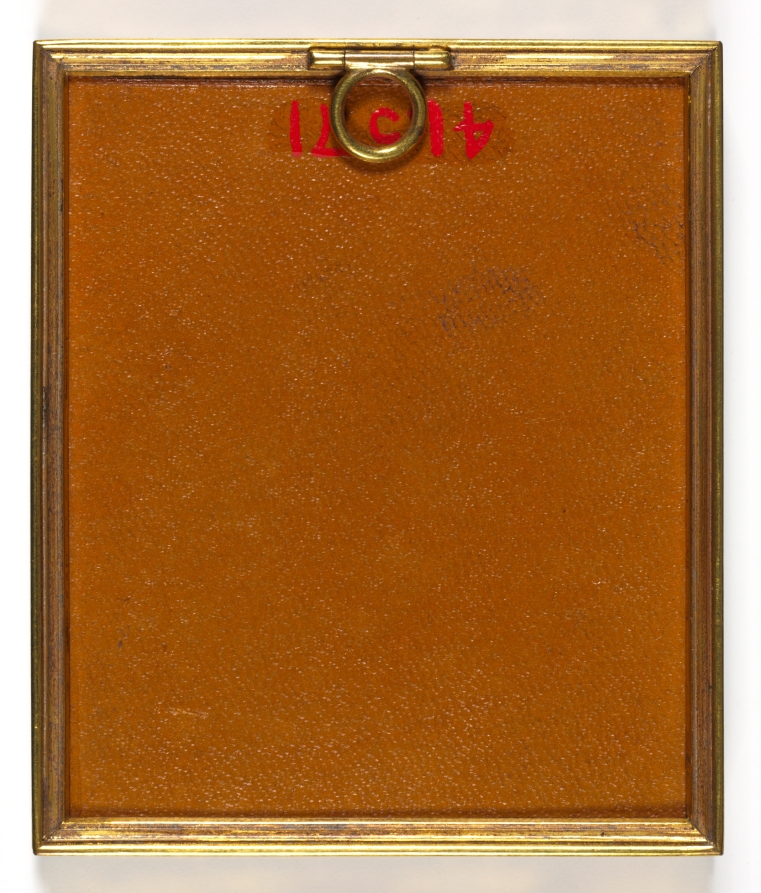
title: Portrait of Mr. Shippard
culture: England, 18th century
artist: John I Smart (British, 1741–1811)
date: c. 1776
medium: graphite and wash on laid paper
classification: Portrait Miniature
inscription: inscribed very faintly in graphite on front at upper right: 161; on back (paper backing to which drawing paper was adhered) inscribed in graphite, at top upside down: 161; also on paper backing in graphite, on a slant at lower left: Mr. Jones; inscribed on back of drawing, beneath paper backing, in graphite: Mr Shippar[d] large Bracelet size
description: Although it is impossible to say whether or not it was always part of the artist’s process to execute a preparatory sketch prior to painting each miniature, we do know that John Smart retained many hundreds of these sketches. A group of preparatory sketches—of which this portrait is one—descended through the Smirke family after Smart’s daughter Sarah gave a sketchbook containing preparatory portrait studies to her friend Mary Smirke, sister of the celebrated Victorian architect Sydney Smirke. This book was probably broken up around 1877 when its contents was divided between Sydney’s daughters Mary Jemmett and Mrs. Lange, whose portions were both sold at auction in 1928. G. C. Williamson was the first to suggest that Smart’s sketches were well known and that they were preparatory studies for the painted miniatures. Williamson listed the names of sitters from the sketches known to him at the time, and they include a Mr. Jones, the title formerly given to the sketch here. This designation was applied only to a paper backing that had been attached after the drawing had been removed from the sketchbook. There is no further evidence for this attribution, however. The sketch is of the sitter’s head only, with a slight suggestion of a high stock collar. His head faces to the left, and his light hair is combed straight back with a flat curl above his right ear. He is depicted in an oval, and the background is unpainted. The number 161 is inscribed in graphite on both the front of the drawing and its paper backing. Upon removal of the paper backing in 1993, an inscription in graphite was revealed. Perhaps written in the artist’s hand, it suggests that the sitter’s name may be Mr. Shippar[d]. There are no known portraits of this gentleman. The work can be dated to about 1776 because of its size, which, when painted on ivory, would have been around 2 inches in height. An inscription on the back of the drawing suggests that the miniature was to be mounted on a bracelet. To this date, the finished ivory for which this preparatory sketch was presumably undertaken has not been discovered.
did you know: Sketches helped John Smart work out the particulars of a portrait before commencing the miniature on ivory, and they were useful in the event that a duplicate might later be required.